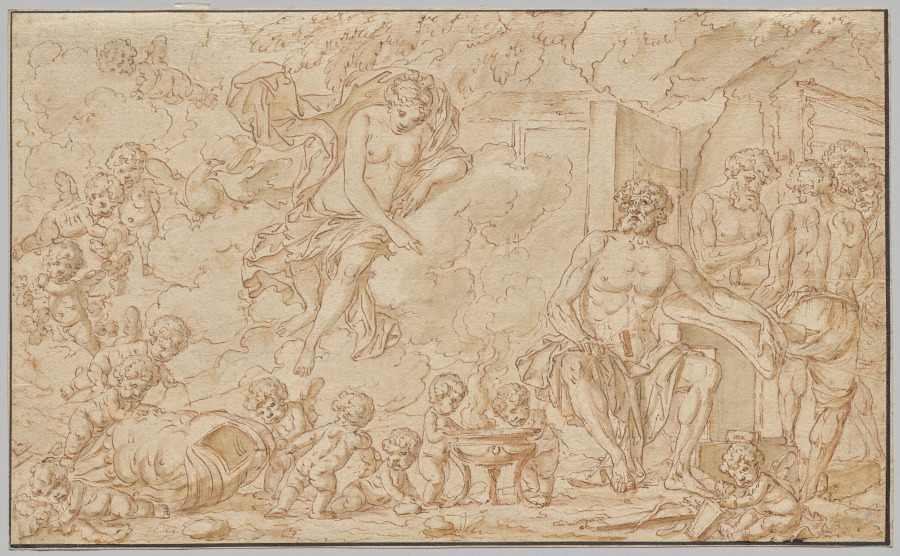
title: Venus at the Forge of Vulcan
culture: France, 18th century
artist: Louis Félix de La Rue (French, 1731–1777)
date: 18th century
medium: Pen and brown ink, and brown wash (bistre) with red chalk and traces of graphite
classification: Drawing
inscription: verso of secondary support: center, in graphite: 371; lower center, in graphite: [illegible name ?] Aix 1665-1695 Paris; ruled lines and other illegible notations in black ink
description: Venus, the goddess of love, descends on a cloud into the forge of Vulcan, the god of fire and metalworking. This scene illustrates an episode from Virgil’s Aeneid in which Venus has come to collect the suit of armor she asked Vulcan to make for her son, Aeneas. Several putti on the left play with the finished product.